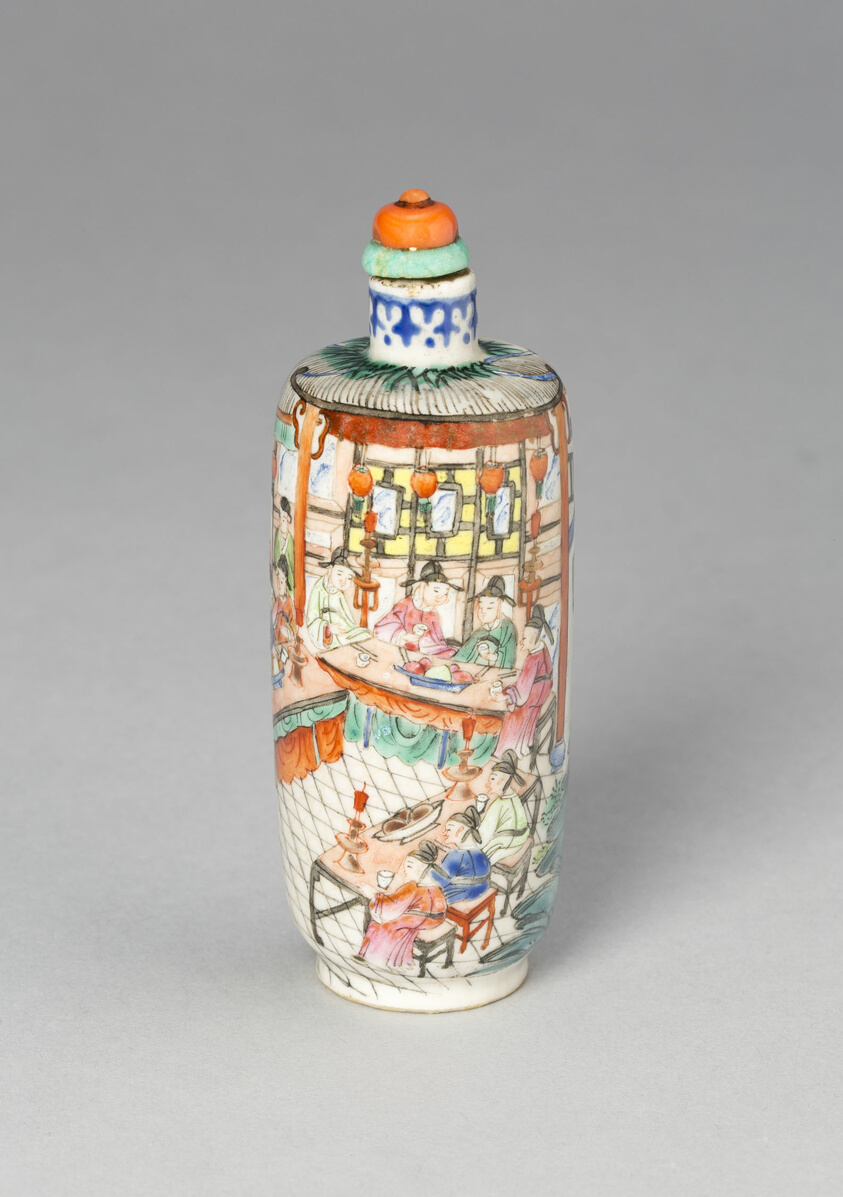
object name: Vessel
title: Snuff Bottle with a Scene from the Dream of the Red Chamber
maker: China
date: Qing dynasty (1644–1911), Jiaqing reign mark and period (1796–1820)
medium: Porcelain painted in overglaze enamels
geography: China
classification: snuff bottle; porcelain; ceramics; asian art; vessel